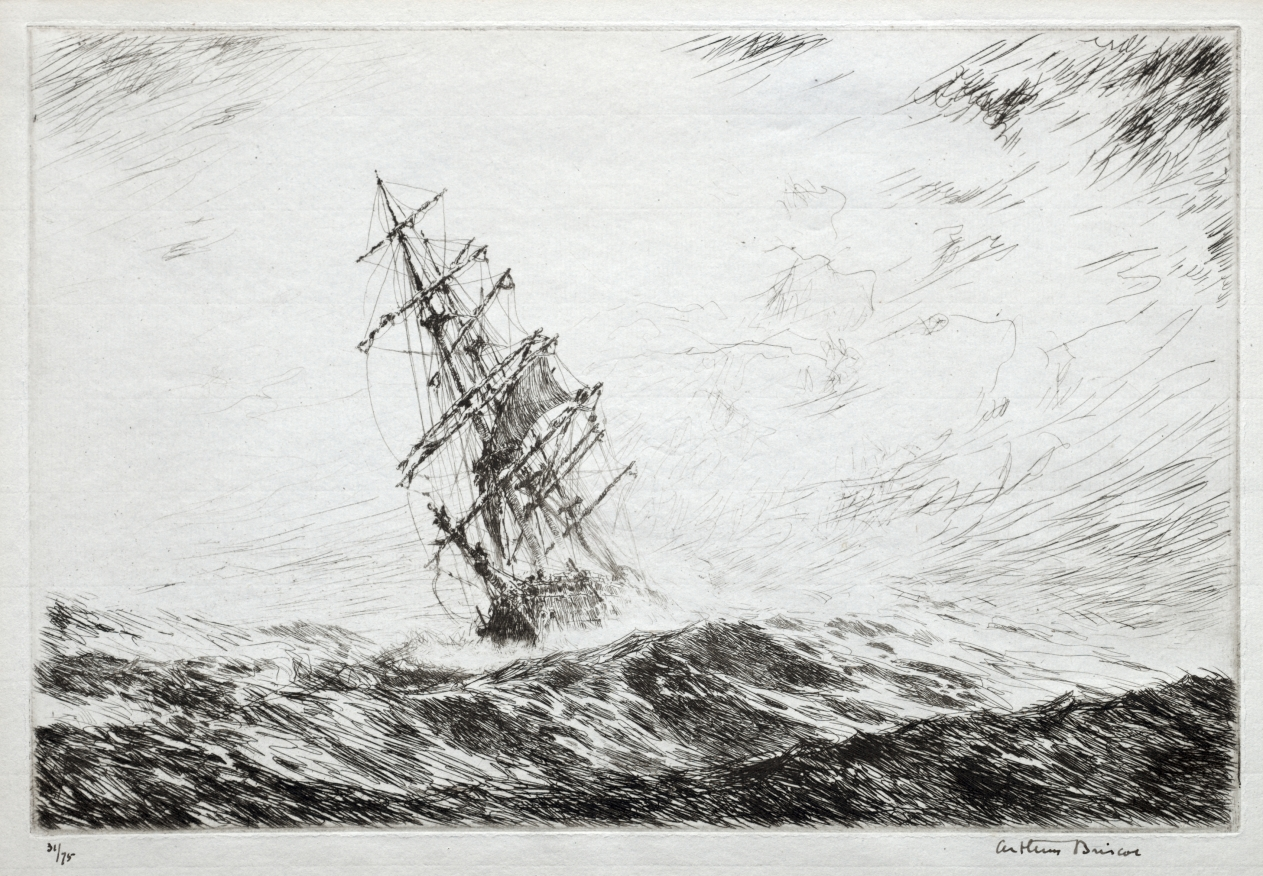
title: Hove To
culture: England, 20th century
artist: Arthur John Trevor Briscoe (British, 1873–1943)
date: 1929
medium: etching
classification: Print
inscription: Lower margin, in brown ink: 31/75 Arthur Briscoe